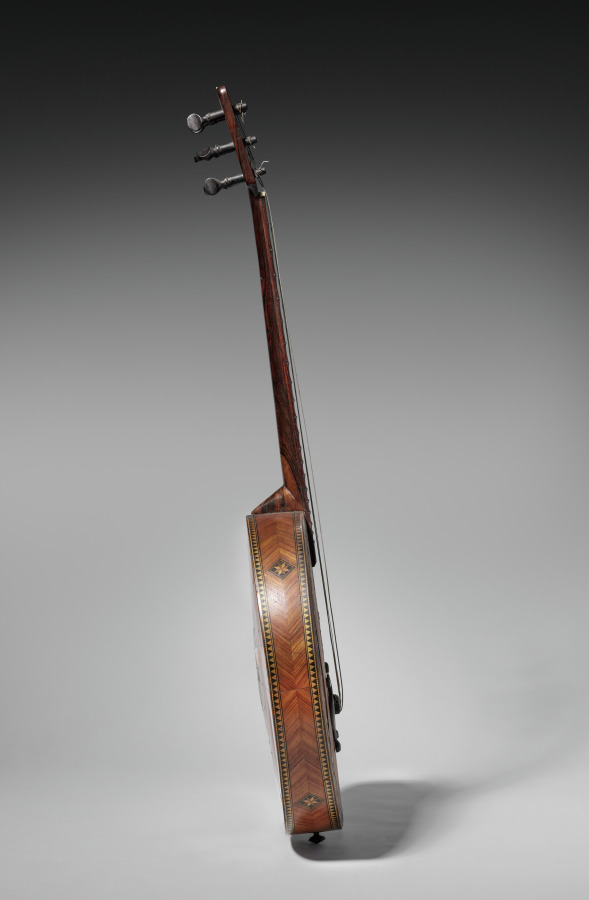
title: Guitar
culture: Italy, 19th century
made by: probably by Fernando Theze (Italian)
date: c. 1860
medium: wood, ebonized wood, mother of pearl inlay, resin, bone?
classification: Musical Instrument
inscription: label inside reads: "Faite a Turin par F. Theze--Amateur."